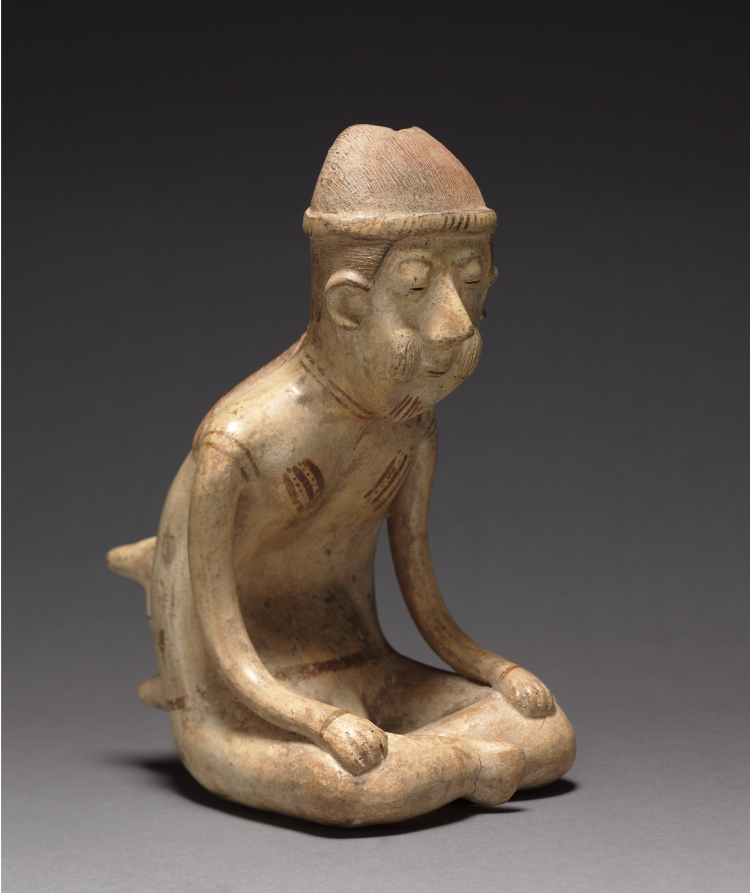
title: Seated Male Figure with Backrest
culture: Mexico, Nayarit, Chinesco style, Type E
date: 100 BCE–300 CE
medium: pottery with burnished cream and red slips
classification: Sculpture